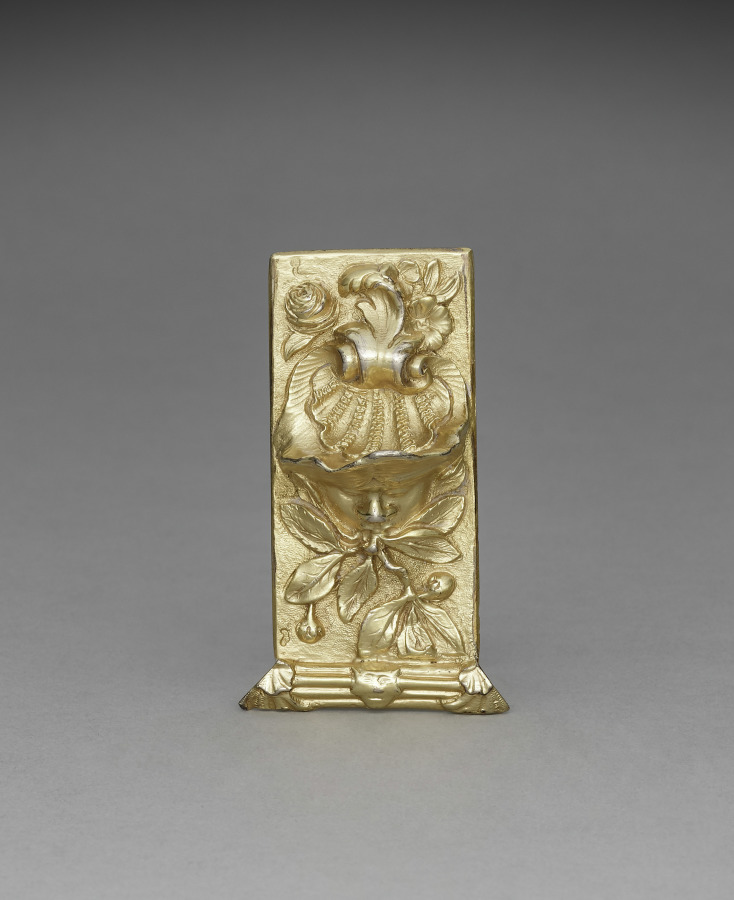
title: Tea Caddy (lid)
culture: England, London, 18th century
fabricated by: Paul Jacques de Lamerie (British, 1688–1751)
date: 1741–1742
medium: silver gilt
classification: Silver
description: In the 1600s and 1700s, silver played a significant role in projecting wealth, status, power, and ritual in British life. Tea was likewise a highly valued commodity, and as such, silver caddies were designed to display the social distinction of its owner. The prominently sloping shoulders of this lid's accompanying canister were designed by Paul Jacques de Lamerie in the early 1730s and became a standard form for tea caddies by the end of the decade.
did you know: This is the lid to a tea caddy. See cover record.